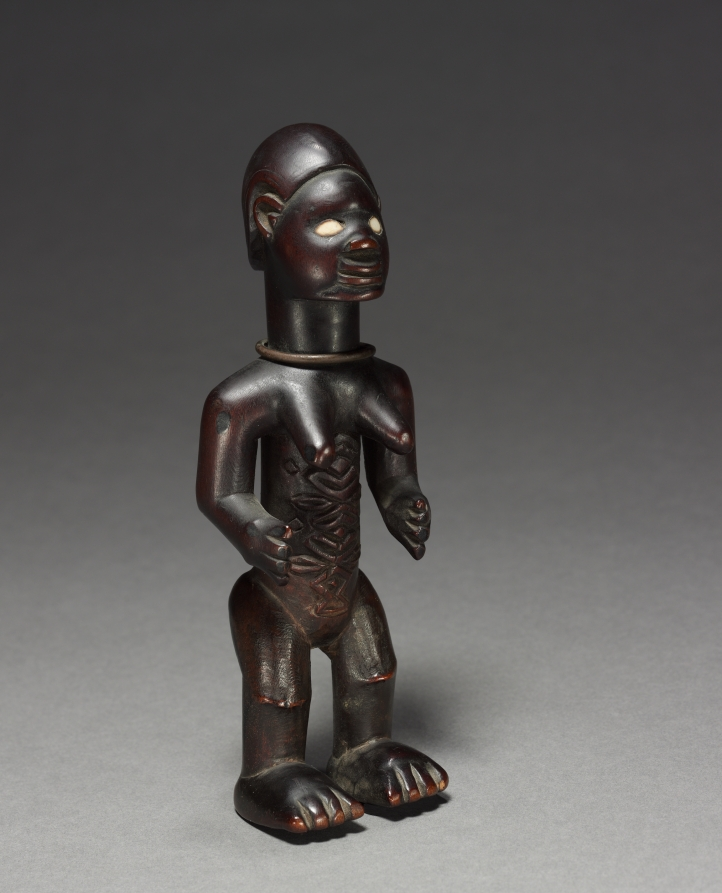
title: Female Figurine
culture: Africa, Central Africa, Republic of the Congo, Beembe-style maker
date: late 1800s-early 1900s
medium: Wood, possibly ceramic, and copper alloy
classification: Sculpture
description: Beembe figurines generally have greatly detailed anatomical and decorative features. The scarification among Beembe men and women communicated their ideas about local beauty and ethnic belonging. These figures are charged with an ancestor’s spirit through a mixture of resin and human-derived ingredients—taken from the corpse of the person they possibly portray—into a small cavity near the rectum.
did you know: The carvings in the figure’s abdomen reflect the custom of body scarification among the Beembe people.